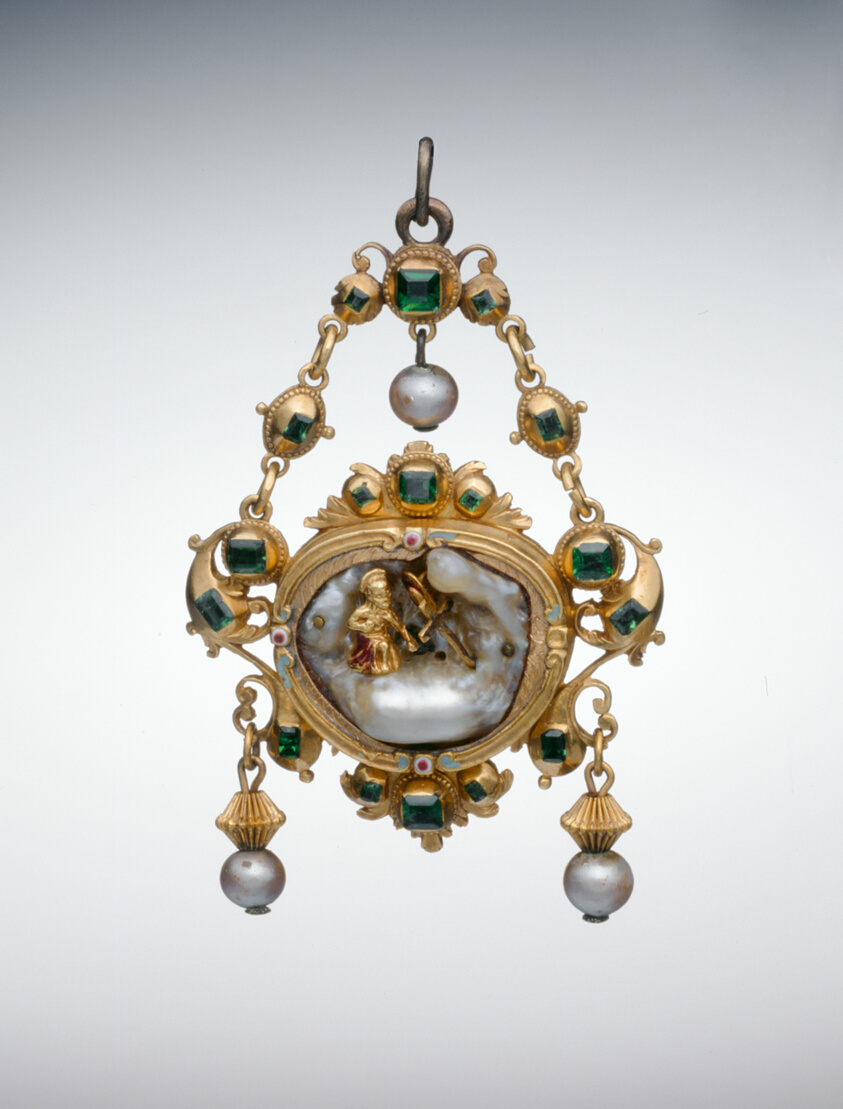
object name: Costume and Accessories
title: Pendant with the Penitent Saint Jerome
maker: Spanish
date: c. 1650 (central jewel); c. 1700 (mount)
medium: Gold, enamel, emeralds, baroque pearl, and pearls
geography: Spain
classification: pendant (jewelry); jewelry; european decorative arts; costume